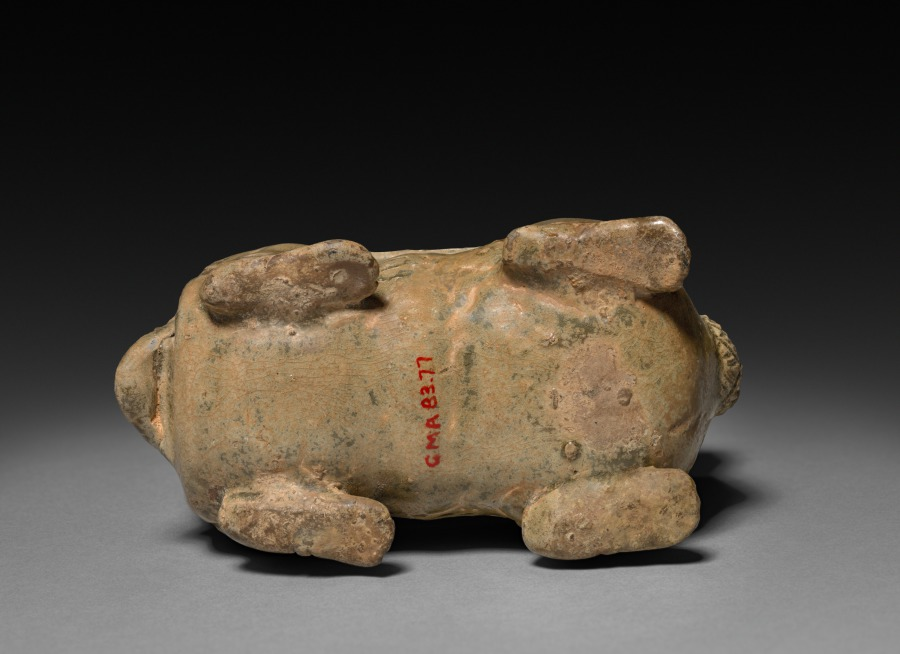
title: Candlestand in the Shape of a Chimera Bixie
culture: China, Western Jin dynasty (265-316 CE)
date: 265–316 CE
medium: Glazed stoneware with molded and incised decoration, Yue ware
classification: Ceramic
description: The candlestand in the shape of a chimera or bixie (a fantastical hybrid creature that was believed to ward off evil spirits) was molded in two parts. Incisions on both sides of the feline body suggest wings. Stone bixie placed in front of tomb entrances are prominent among the Six Dynasties kings buried in Nanjing. Candlestands in the form of chimera were found in tombs but may have been used in daily life too.